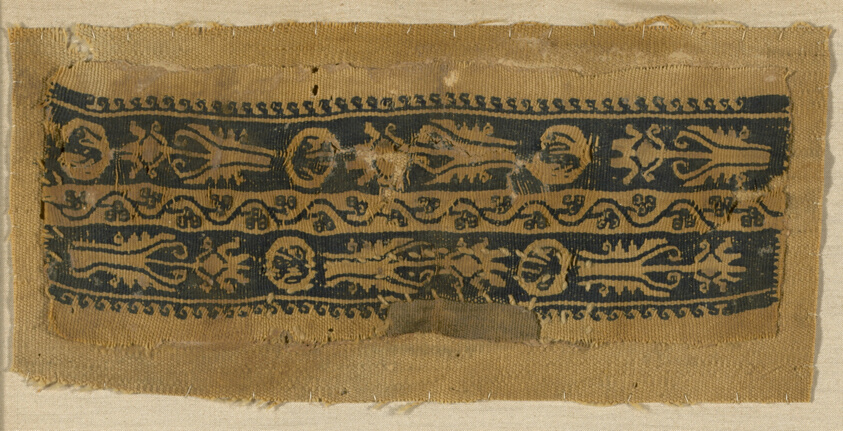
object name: Textile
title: Cuff Band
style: roman period (egyptian)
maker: Coptic (Egypt)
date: Roman period (30 B.C.– 641 A.D.), 5th/6th century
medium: Wool, tapestry weave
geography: Egypt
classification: textile; weaving